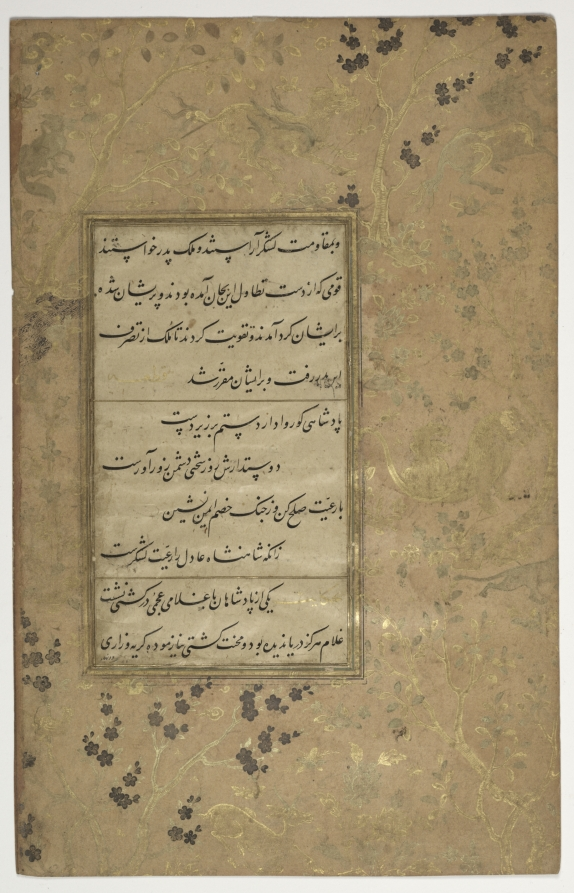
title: Illuminated folio from a Gulistan (Rose Garden) of Sa'di (c. 1213–1291)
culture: Iran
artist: Sultan 'Ali al-Mashadi (Iranian, 1430–1520)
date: about 1475–1500; border: about 1550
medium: Gum tempera, ink, gold, and silver on paper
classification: Manuscript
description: In the border surrounding the Persian poetical text, deer and a lion coexist peacefully in a forest. This imagery may reference the rule of a righteous king. The text is from the Gulistan, one of the most celebrated works of Persian literature, completed around 1258. Gulistan means “Rose Garden” in Persian; just as a rose garden is a collection of flowers, the contents are a collection of anecdotes. This page is from the section “On the Conduct of Kings.”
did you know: The silver blooms and streams of water have tarnished and darkened over time.